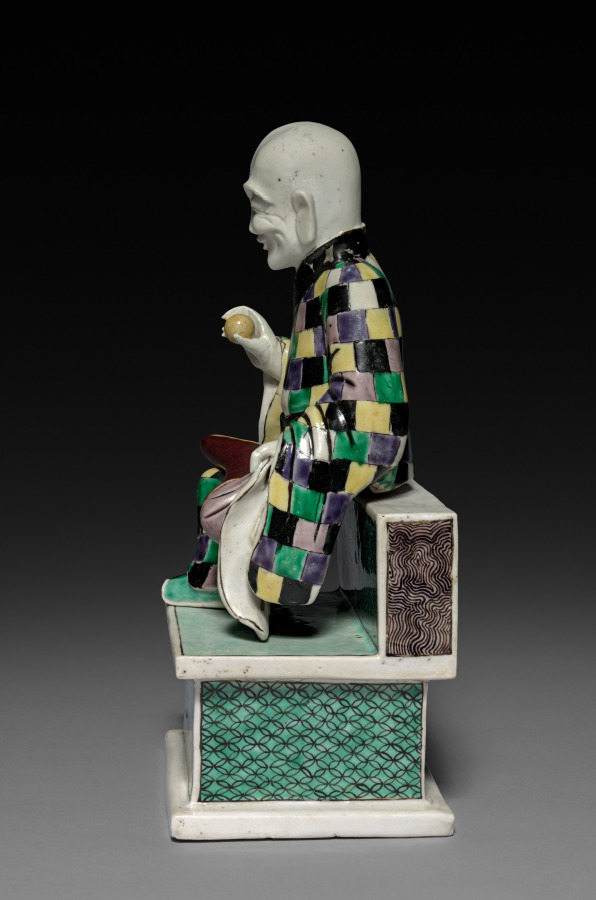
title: Lohan (Arhat) Holding a Peach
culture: China, Jiangxi province, Jingdezhen kilns, Qing dynasty (1644–1911), Kangxi reign (1662–1722)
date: 1662–1722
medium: porcelain with famille verte overglaze enamel decoration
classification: Ceramic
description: Lohan are disciples of Buddha with supernatural powers and eccentric behaviors. This lohan is holding the peach of longevity (shoutao), while its mate is holding the fu-dog, symbolizing good luck. With carefree smiles and playful gestures, these two figures embody a humorous attitude and a detachment from worldly affairs. This pair of porcelain figures was perhaps part of a house altar set or a decorative item in a household.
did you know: This lohan with a bald head wears a monk’s robe made of patches.